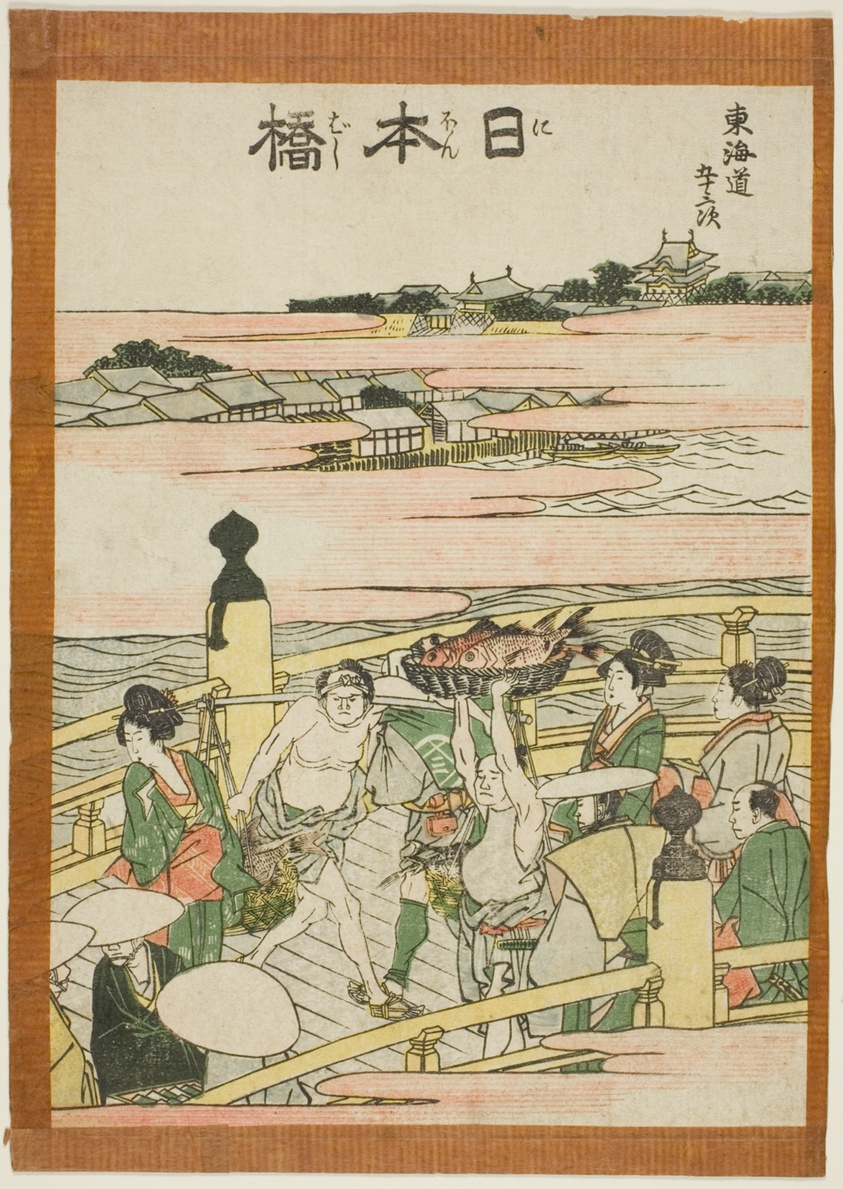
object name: Print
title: Nihonbashi, from the series "Fifty-three Stations of the Tokaido (Tokaido gojusan tsugi)"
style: Japanese (culture or style)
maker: Katsushika Hokusai 葛飾 北斎; Japanese, 1760-1849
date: c. 1806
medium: Color woodblock print; chuban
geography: Japan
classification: woodblock print; print; asian art